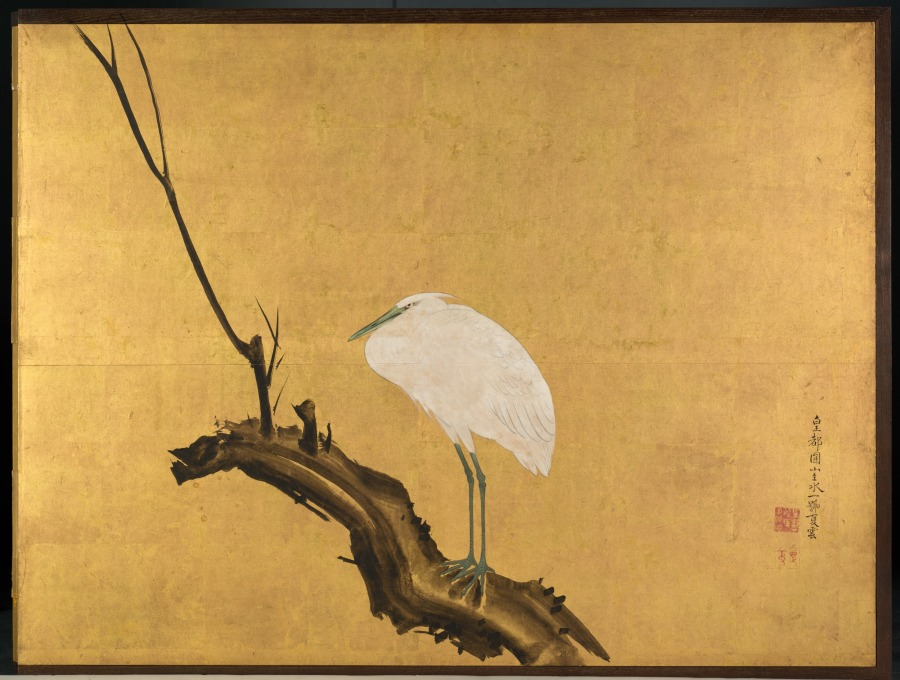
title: Heron on a Willow Branch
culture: Japan, Edo period (1615–1868)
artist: Maruyama Ōkyo (Japanese, 1733–1795)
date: late 1700s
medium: Two-panel folding screen; ink, color, lacquer, and gold on silk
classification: Painting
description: Okyo was the most influential painter and teacher of his time in Kyoto. His mastery of brush and ink found expression in a variety of Chinese and Japanese subjects, painting styles, and formats. This depiction of a heron on a willow branch is done in a classical Japanese painting (yamato-e) style, utilizing flat areas of colorful pigments set against an expansive background with little or no spatial depth.